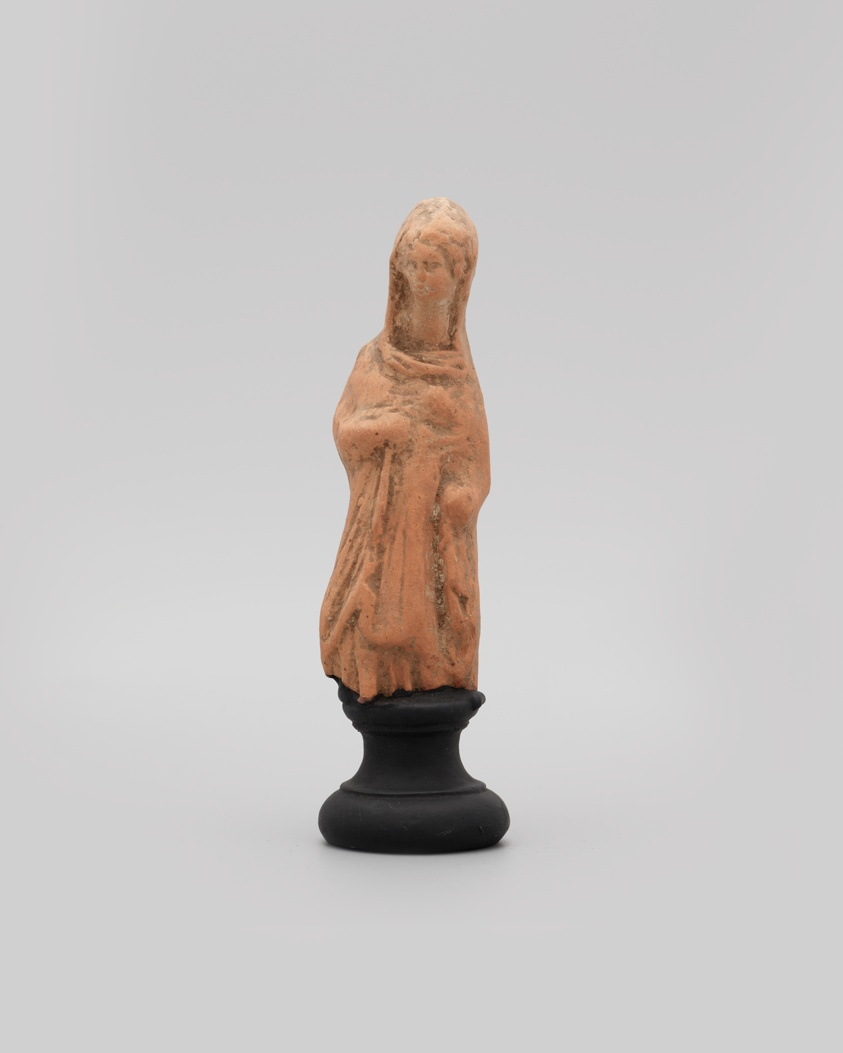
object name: Sculpture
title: Statuette of a Woman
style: greek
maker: Greek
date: 5th-4th century BCE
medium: terracotta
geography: Smyrna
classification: earthenware; ceramics; sculpture; ancient art